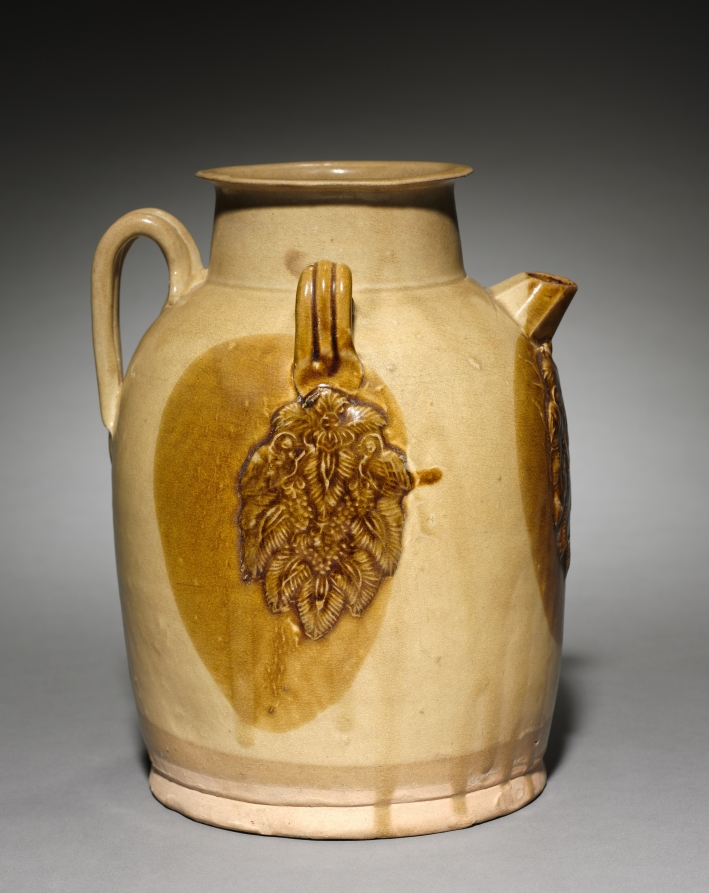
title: Ewer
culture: China, Hunan province, Tongguan, Tang dynasty (618–907)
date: 800s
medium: glazed stoneware with molded and applied decoration, Changsha ware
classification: Ceramic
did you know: Molded clay medallions with a stylized double-bird-and-leaf pattern were applied below the two side loops and the spout.